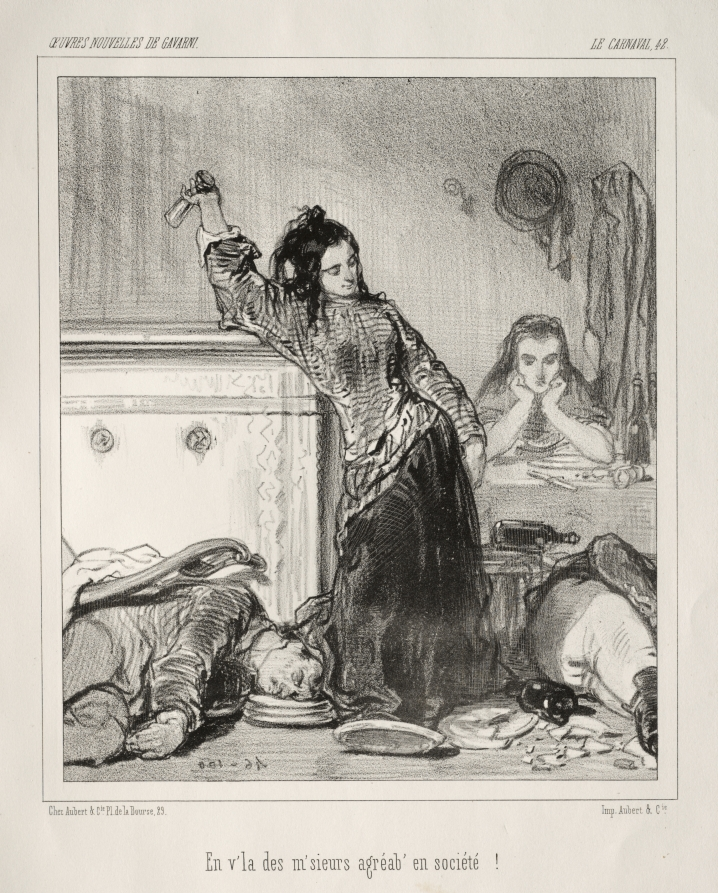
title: Carnaval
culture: France, 19th century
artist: Paul Gavarni (French, 1804–1866)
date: c. 1841–47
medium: lithograph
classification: Print